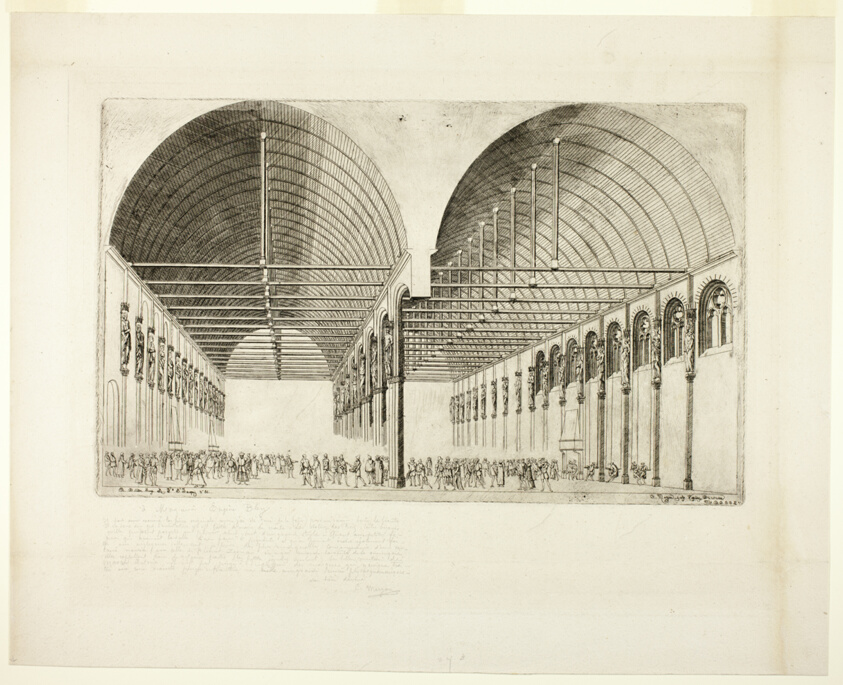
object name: Print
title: The Antechamber of the Palais de Justice, Paris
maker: Charles Meryon (French, 1821-1868); after Jacques Androuet du Cerceau, the Elder (French, c. 1515-1585); printed by Auguste Delâtre (French, 1822-1907)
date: 1855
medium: Etching, from a pewter plate, with burnishing, scraping and foul biting on ivory laid paper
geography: France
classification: etching; print; prints and drawing